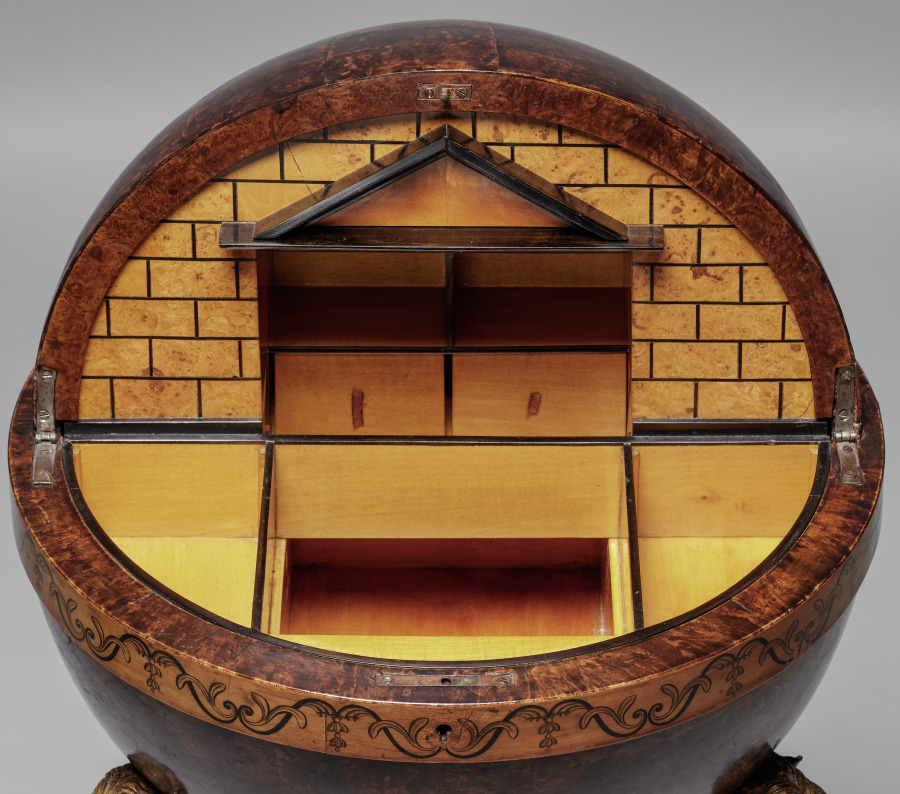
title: Globe Work Table (Globustisch)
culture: Austria, Vienna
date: c. 1810–15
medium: Burl walnut veneer, mahogany, ebony, satinwood, gilt wood, painted wood; mirrored glass; metal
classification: Furniture and woodwork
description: Work tables resembling globes were the usual form for a lady's sewing or writing table around 1800 in Austria. Combining moving parts, secret compartments, and highly finished decoration, these tables were also a way for the cabinetmaker to show off his skill. The tripod supports and temple-like architectural quality of both the exterior and interior decoration reflect the fashionable taste for neoclassical style, or Biedermeier as it was called in Austria, where Vienna was the center of such elaborate furniture production.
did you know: The top half of the globe rotates upward to reveal hidden compartments for sewing tools, threads, and unfinished fabric pieces.